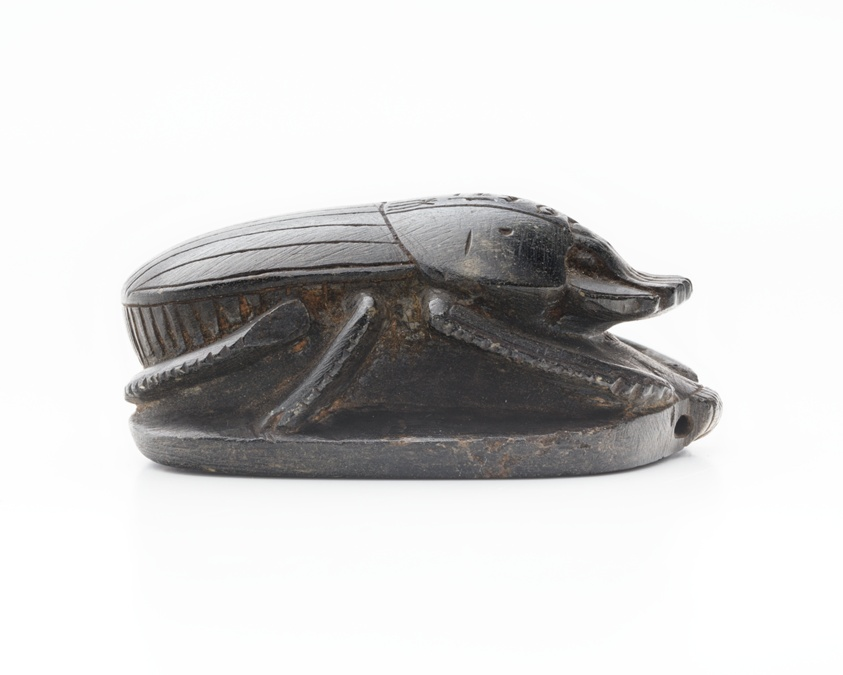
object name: Costume and Accessories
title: Heart Scarab of the Worker Amun-mes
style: new kingdom, egyptian, ancient, nineteenth dynasty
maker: Egyptian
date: New Kingdom, Dynasty 19, reign of Ramesses II (about 1279-1213 BCE)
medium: Steatite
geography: Egypt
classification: scarab; stone; ancient art; costume; amulet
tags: scarab beetle, insects, Hieroglyphs